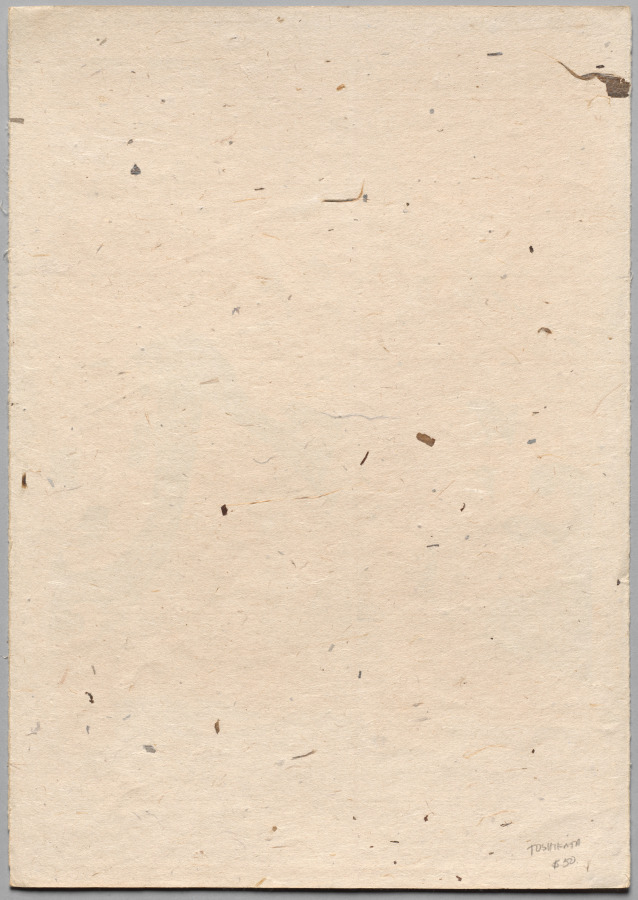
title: A Puppet Made from a Bucket, A Lady of the Enpō Era (1673–1681), from the series Thirty-six Elegant Selections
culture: Japan, Meiji period (1868–1912)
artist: Mizuno Toshikata (Japanese, 1866–1908)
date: 1894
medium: Woodblock print, ink and color on paper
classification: Print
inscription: Inscription Type: series title Inscription Transliteration: 三十六佳撰 Inscription Romanization: Sanjūrokkasen Inscription translation: The Thirty-six Elegant Selections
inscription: Inscription Type: artist’s signature Inscription Transliteration: 年方 Inscription Romanization: Toshikata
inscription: Inscription Type: artist’s seal Inscription Transliteration: 應斎年方 Inscription Romanization: Ōsai Toshikata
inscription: Inscription Type: engraver’s seal Inscription Transliteration: えん活刀 Inscription Romanization: En-Katsu to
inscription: Inscription type: date and publisher’s information Inscription Translation: Meiji 27 (1894) Akiyama Buemon (summary)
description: Each of the prints in the series Thirty-six Elegant Selections features a woman from a different time period, as befits an artist who was interested in history painting. Most of the prints are set in the Edo period (1615–1868). Mizuno Toshikata was a favored student of Tsukioka Yoshitoshi (1839–1892), and took over his post as a newspaper illustrator.